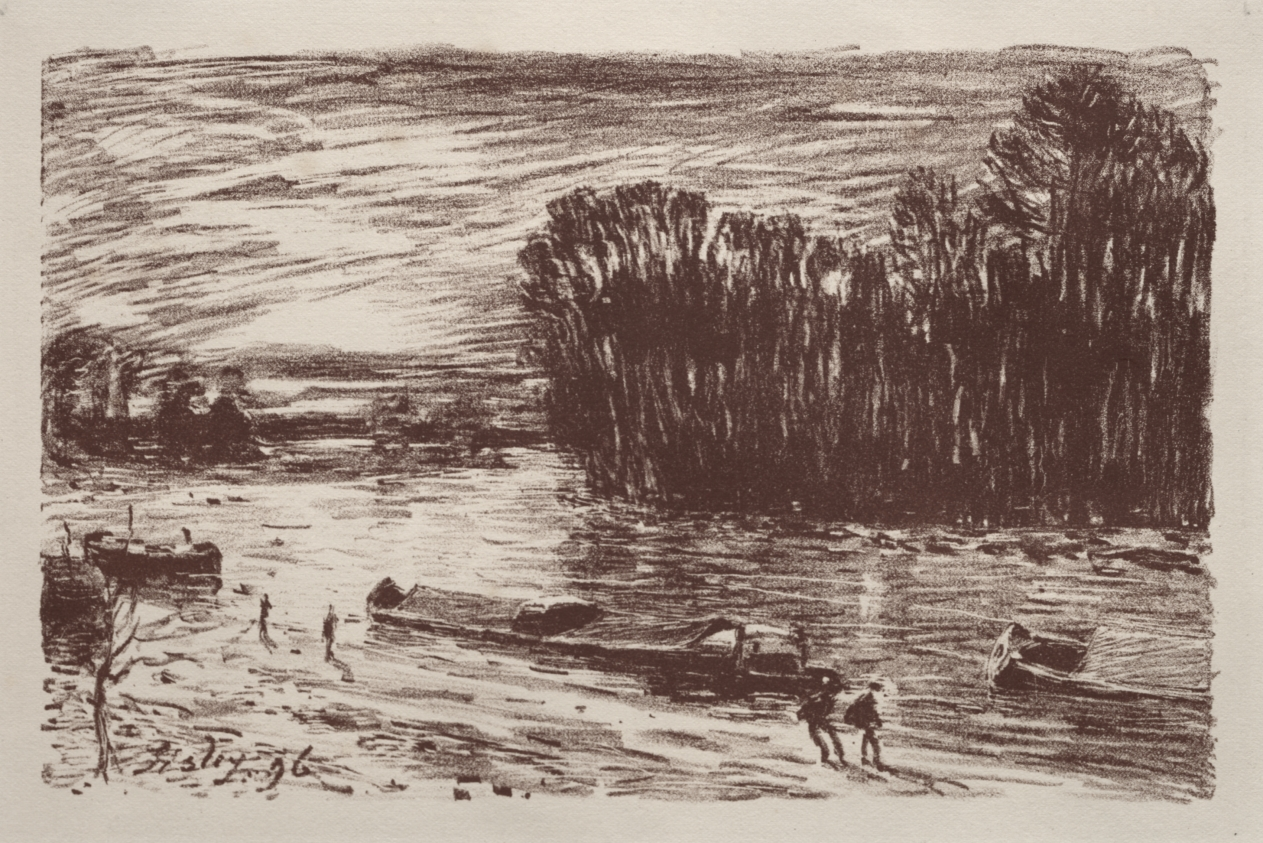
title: On the Banks of the Loing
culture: France, 19th century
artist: Alfred Sisley (French, 1840–1899)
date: 1896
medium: lithograph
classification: Print